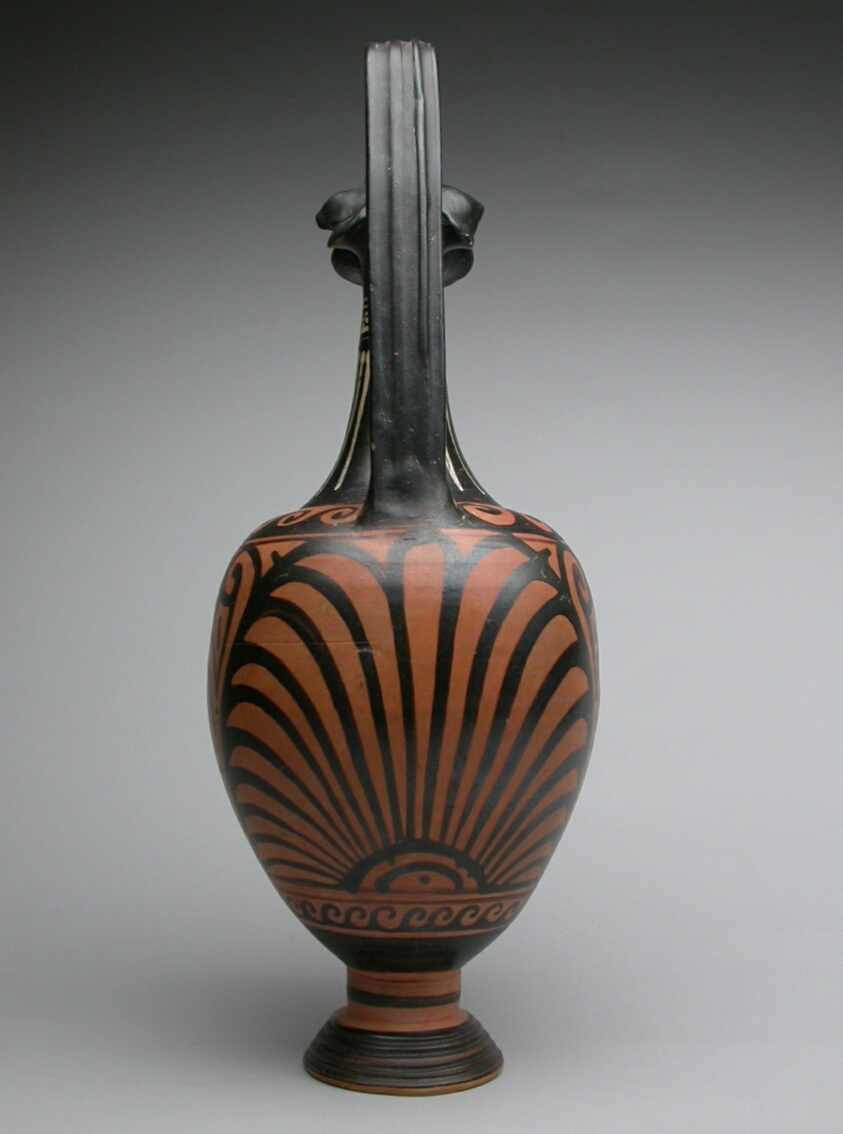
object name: Vessel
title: Oinochoe (Pitcher)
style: red-figure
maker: Attributed to the Mattinata Painter; Greek; Apulia, Italy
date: end of 4th century BCE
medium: terracotta, red-figure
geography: Greece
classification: pitcher (vessel); ceramics; vessel; ancient art